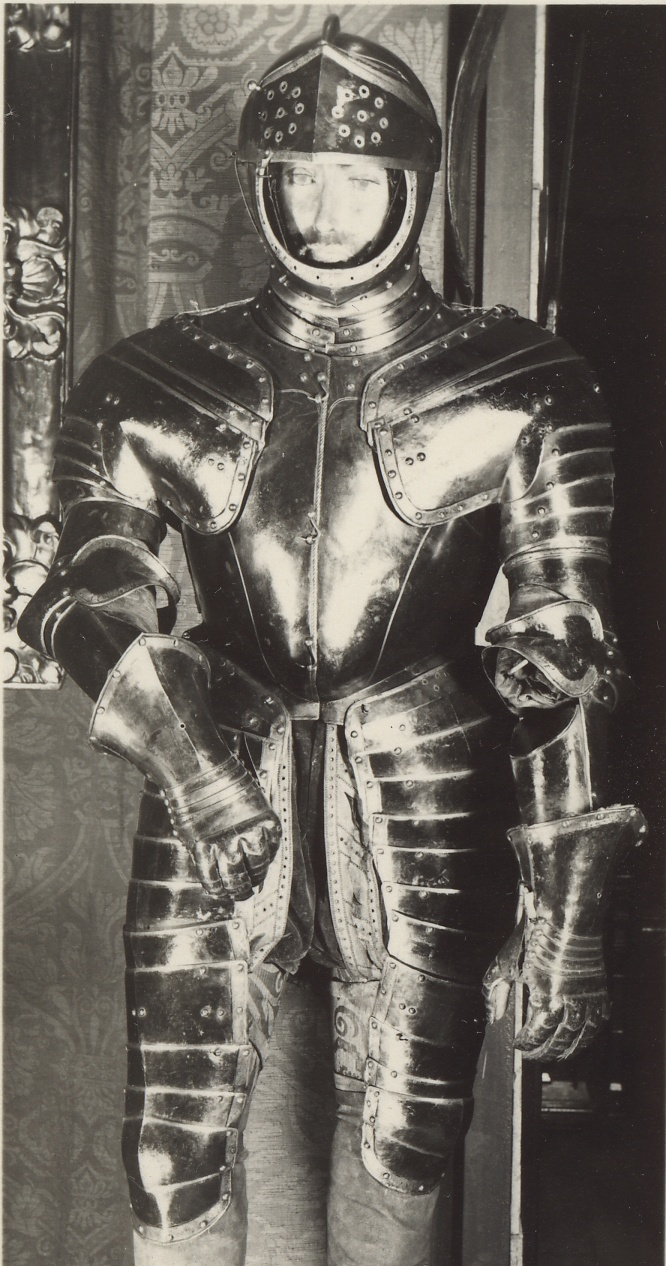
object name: Armor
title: Waistcoat Cuirass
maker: German or Austrian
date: c. 1580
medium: Steel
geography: Germany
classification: suit; armor; arms and armor